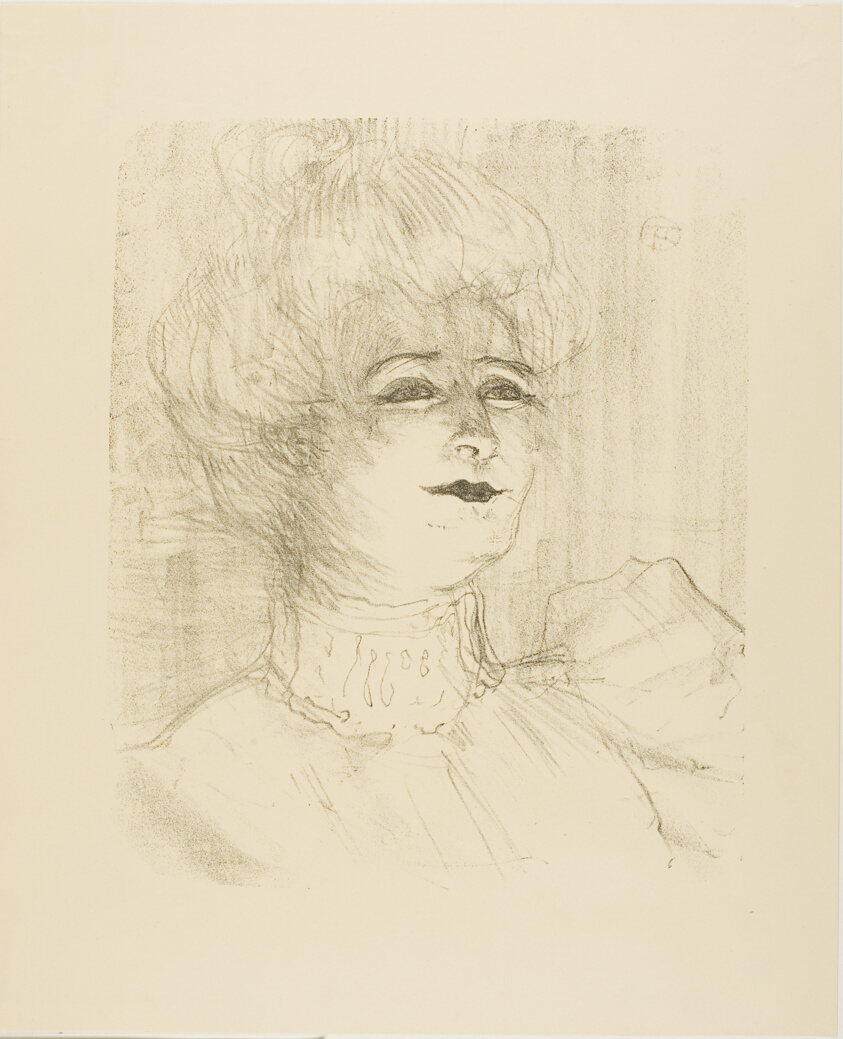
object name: Print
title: Marie-Louise Marsy, from Treize Lithographies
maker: Henri de Toulouse-Lautrec (French, 1864-1901)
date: 1898, published before 1906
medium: Lithograph on cream wove paper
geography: France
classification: lithograph; print; prints and drawing